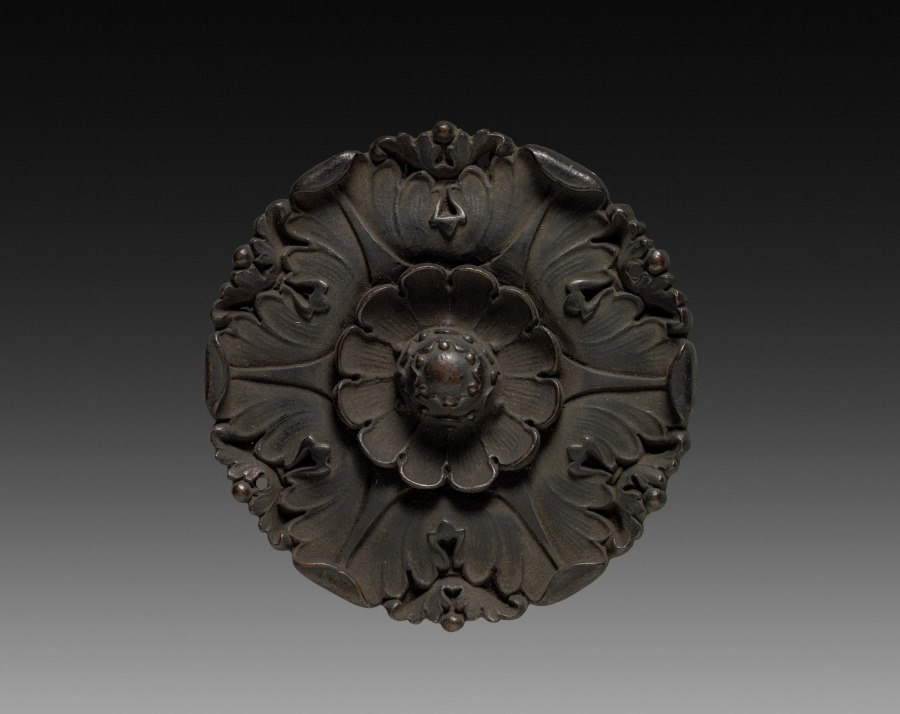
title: Ornamental Detail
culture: France, 18th century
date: 1775–1799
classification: Metalwork